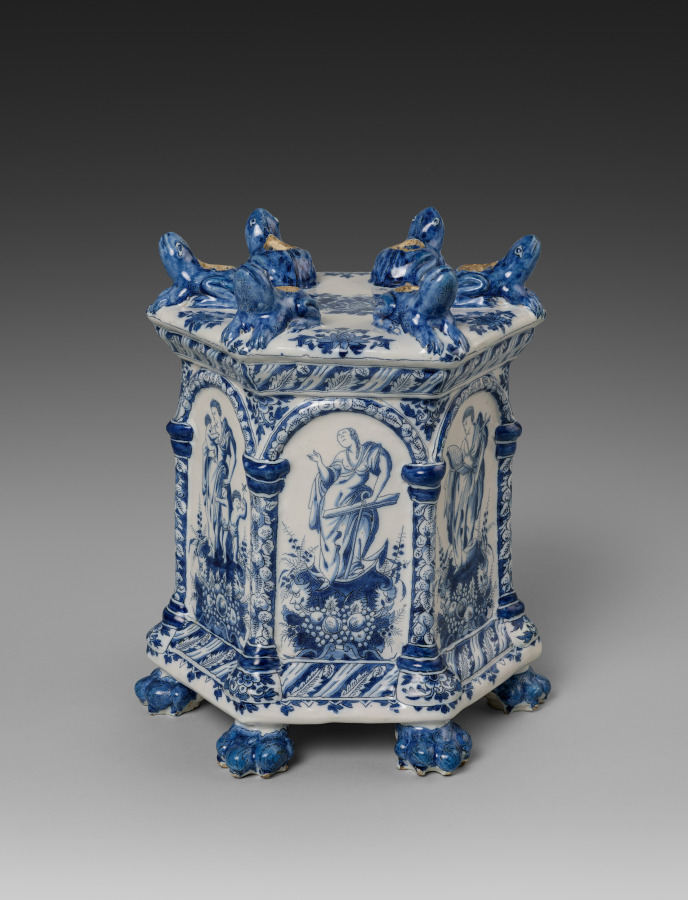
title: Base for a Flower Pyramid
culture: Netherlands, Holland, Delft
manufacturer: Adrianus Kocx (Dutch, active 1686–1701)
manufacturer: De Grieksche A (The Greek A) Factory (Netherlands, 1658–1811)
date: c. 1690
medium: Tin-glazed earthenware, painted in blue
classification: Ceramic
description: Allegorical figures representing Faith, Hope, and Love decorate the base of this pyramid, on which rest six tiers with spouts where flowers can be placed. Flower pyramids are among the most complex and luxurious types of ceramics produced in Delft in the late 1600s. This example was made in the Greek A Factory, owned by Adrianus Kocx. During his tenure, the factory became the most prestigious of Delft potteries and received commissions from Queen Mary II, who ruled over England, Scotland, and Ireland together with her husband, William III. She contributed to the international spread of the fashion for Delft ceramics.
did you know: The iconic blue-and-white ceramics from Delft originated as an attempt to copy Chinese porcelain.